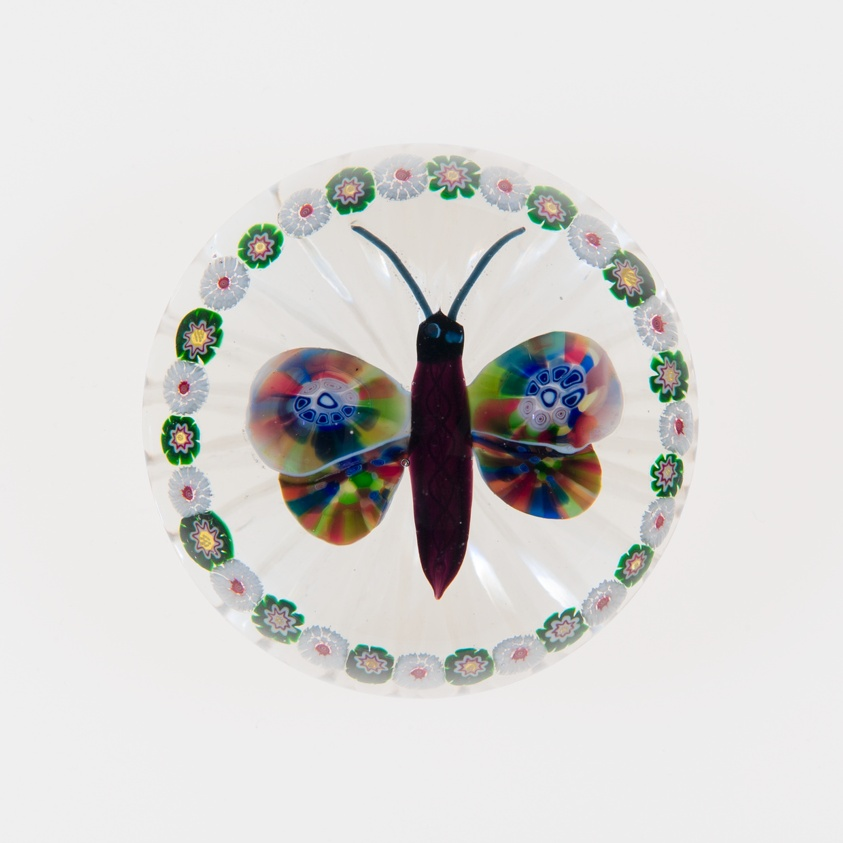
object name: Glass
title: Paperweight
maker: Baccarat Glassworks (Cristalleries de Baccarat); Lorraine, France, founded 1764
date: c. 1845–60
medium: Glass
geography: Baccarat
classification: paperweight; glass